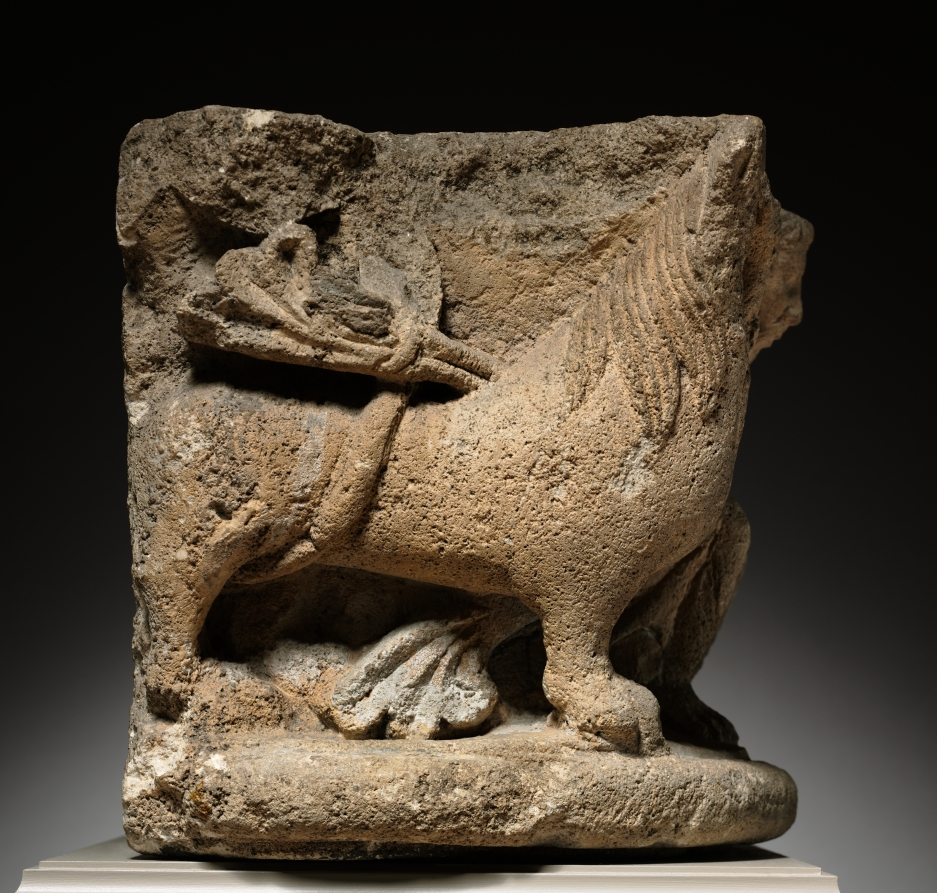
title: Engaged Capital with a Supporting (Caryatidal) Figure Flanked by Lions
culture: Western France, Vendée or Angoulême?, 12th century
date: c. 1125–1150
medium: limestone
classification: Sculpture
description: This sculpture is an excellent example of the Romanesque sculptor’s ability to accommodate his subject to the format of the capital. Much of the artistic quality of this work derives from the skillful contrast and balance of rounded solids, deep voids, and shallow prismatic hollows. It also illustrates the love of fanciful subject matter in largely religious contexts. A capital is essentially the top element of a column, usually carved, that acts as a mediator between the column and the load it supports. In this way, the subject of this capital serves as a metaphor.